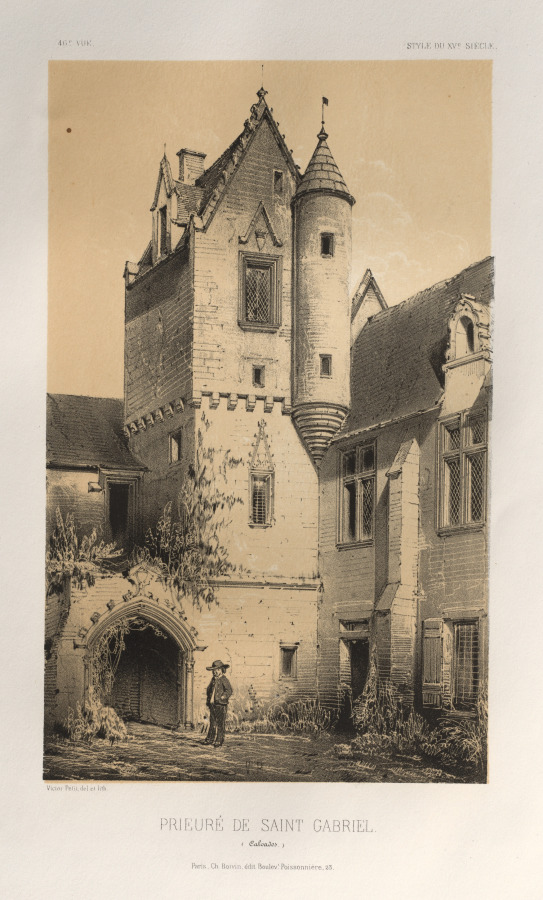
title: Architecture Pittoresque ou Monuments des XVeme. Et XVIeme. Siecles: Chateaux de France des XV et XVI Siecles: Pl. 46, Prieuré De Saint Gabriel (Calvados)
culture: France, 19th century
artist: Victor Petit (French, 1817–1874)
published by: Charles Boivin (publisher and editor); Lith de Godard a Paris (printer)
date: 1860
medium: lithograph with tint stone, from portfolio of 100 lithographs with tint stone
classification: Print